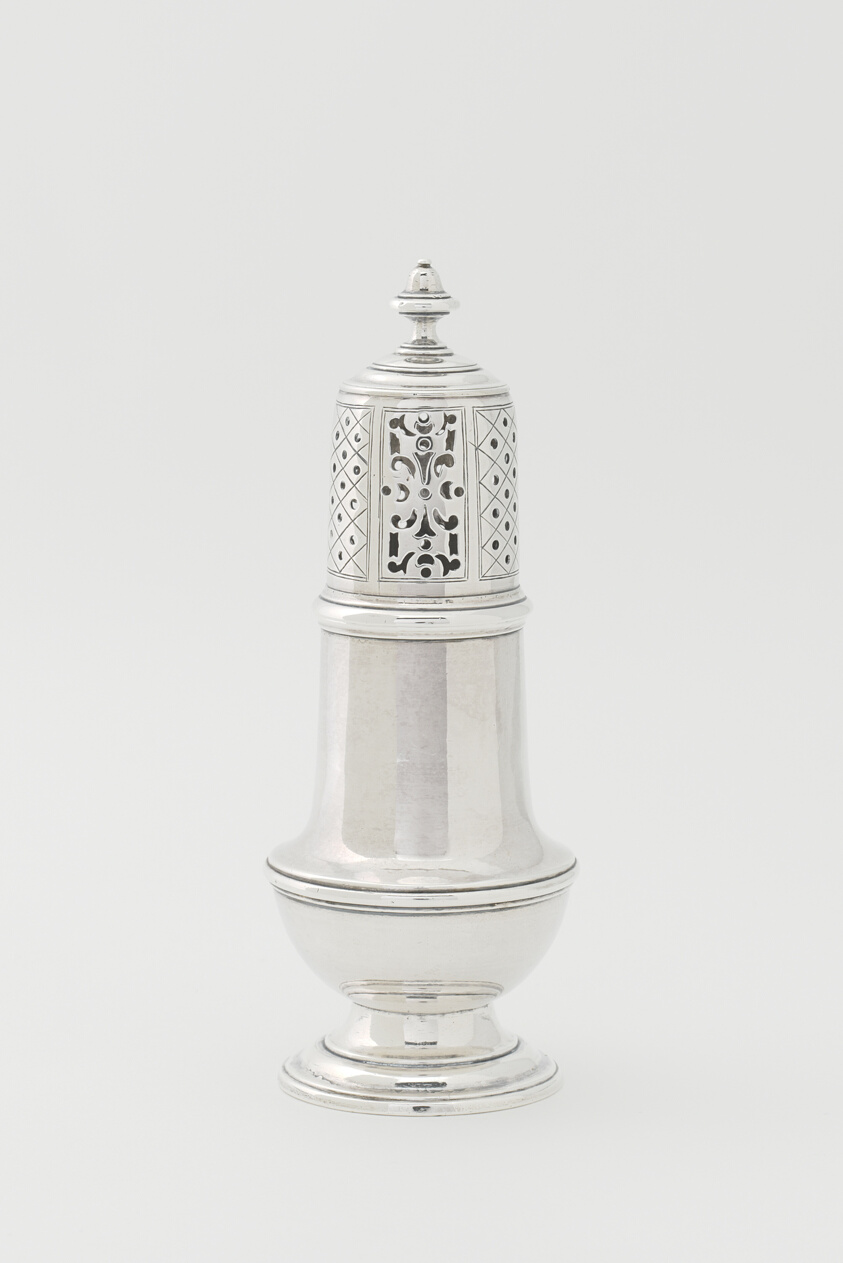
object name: Metalwork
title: Pair of Casters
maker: Attributed to Jacob Hurd; American, 1702/03–1758; Boston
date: 1740–50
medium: Silver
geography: Boston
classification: condiment vessel; silver; american decorative arts; american arts; decorative arts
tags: dining, drinking